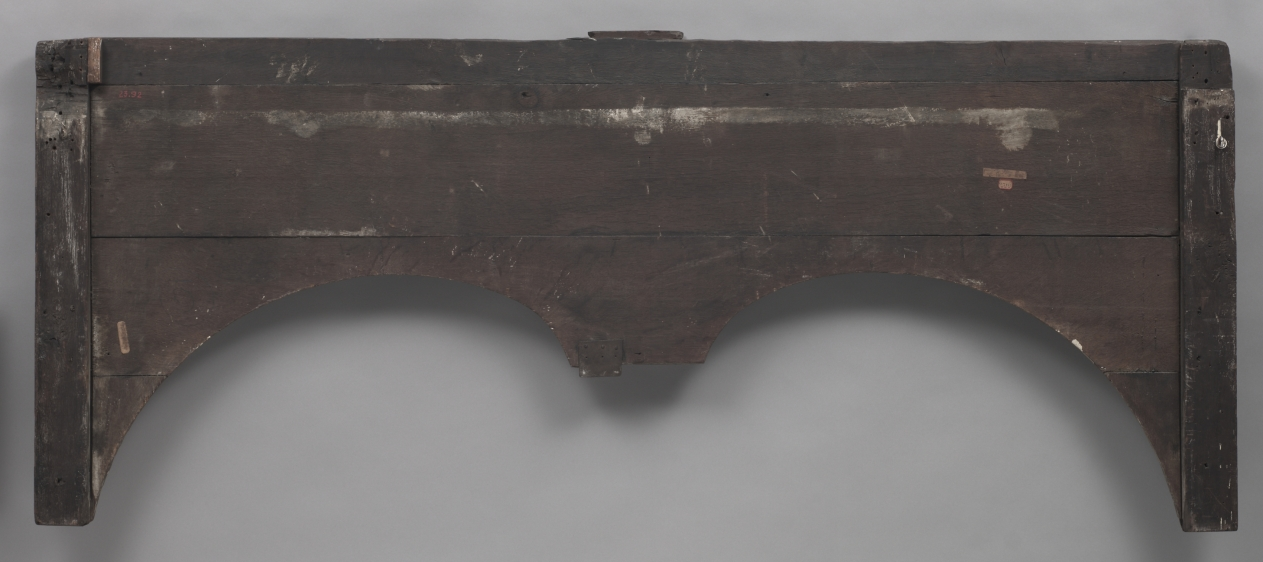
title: Panel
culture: France, Regency Period, 18th Century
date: 1715–1723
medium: wood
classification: Furniture and woodwork